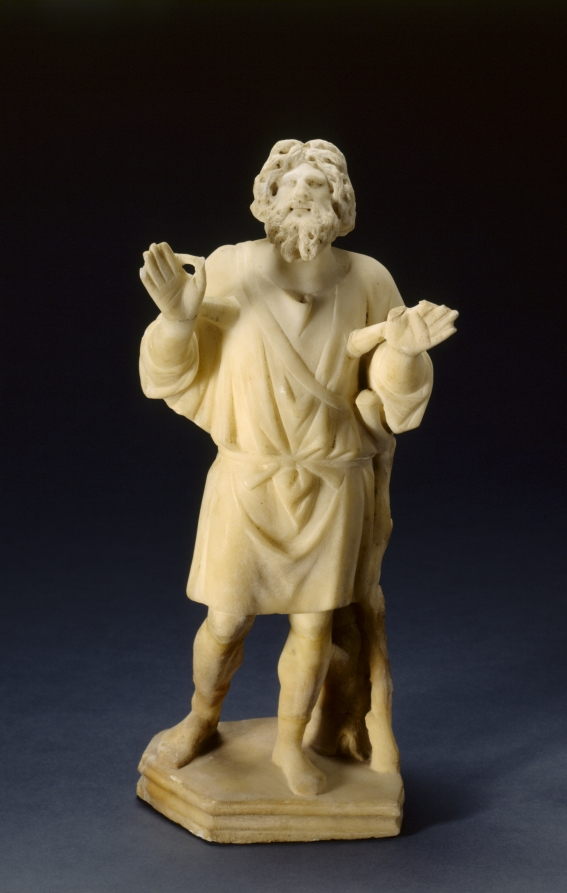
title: Jonah Praying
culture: Anatolia, late Roman-early Christian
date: 280–90 CE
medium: marble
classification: Sculpture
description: The Old Testament prophet Jonah is shown with his hands raised in prayer. It is unclear which moment of the biblical story of Jonah is depicted here. He may be praying in the belly of the sea monster. He might likewise be pleading with the Lord for the city of Nineveh’s destruction or lamenting the withering of the gourd beneath which he sought shelter after fleeing Nineveh.